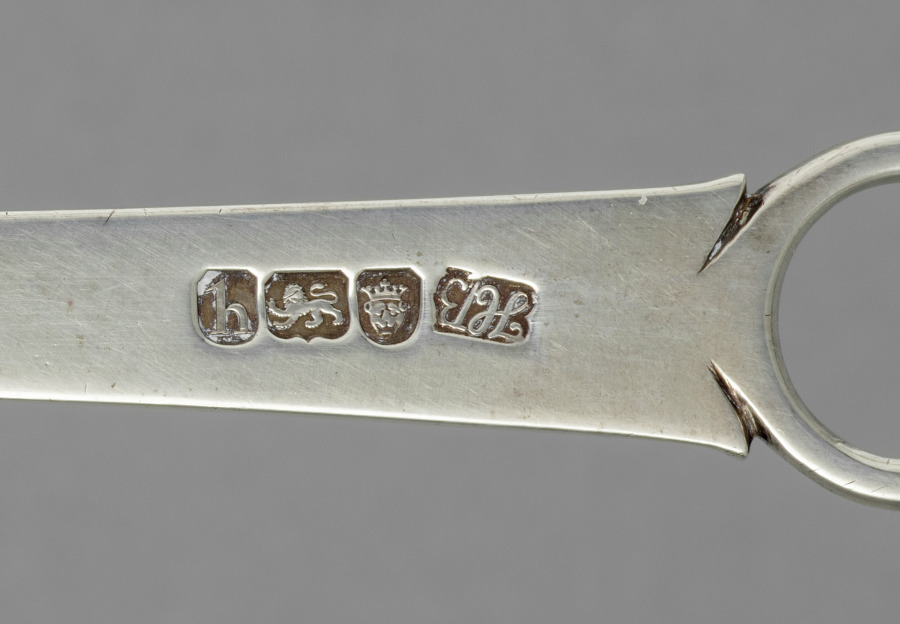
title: Skewer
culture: England, 18th century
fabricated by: Hester Bateman (British, 1709–1794)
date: 1783–1784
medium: silver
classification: Silver